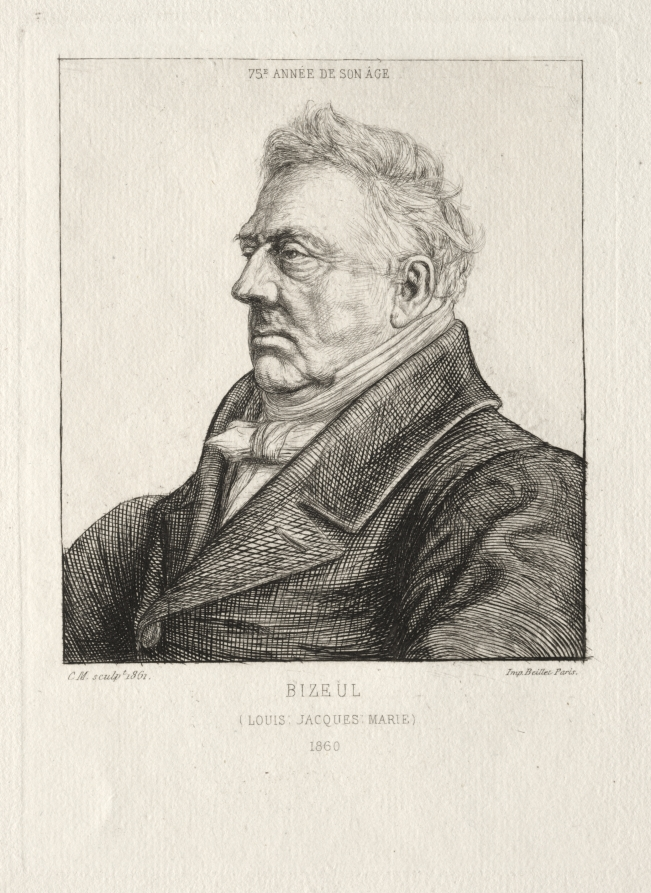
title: L. J. Marie Bizeul, a Breton Archaeologist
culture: France, 19th century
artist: Charles Meryon (French, 1821–1868)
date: 1860–1861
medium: etching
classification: Print